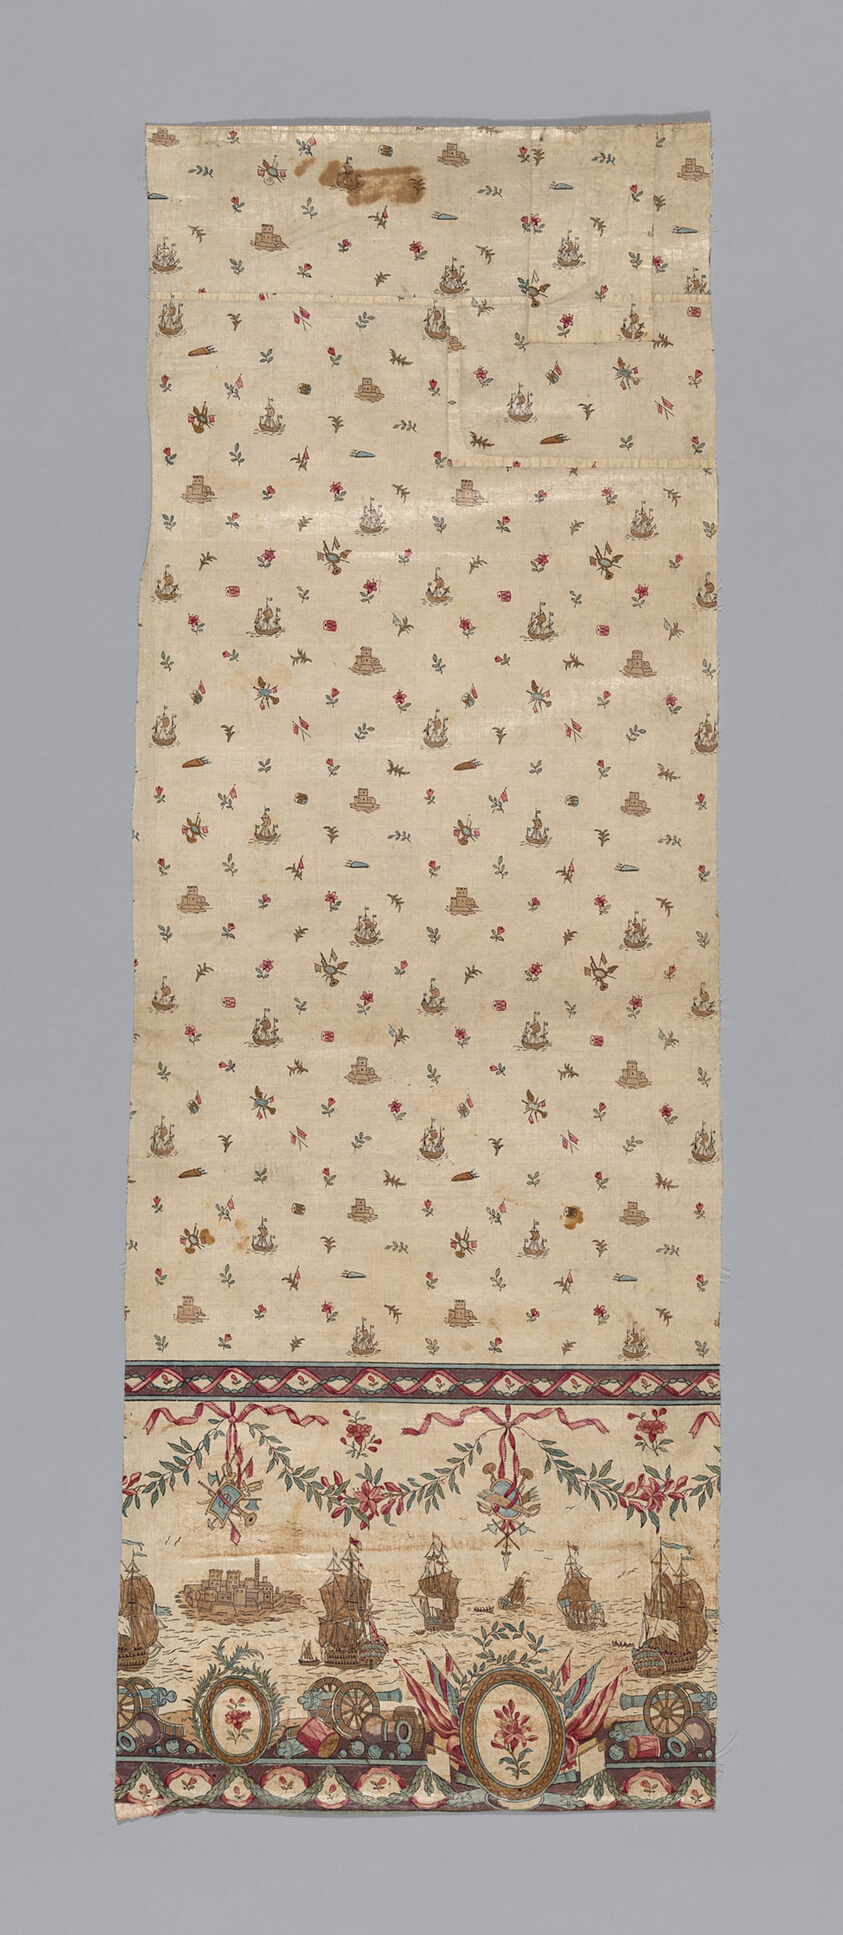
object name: Textile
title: Panel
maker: India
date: late 18th century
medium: Cotton, plain weave; block printed; possibly painted; glazed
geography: India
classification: textile; weaving - printed